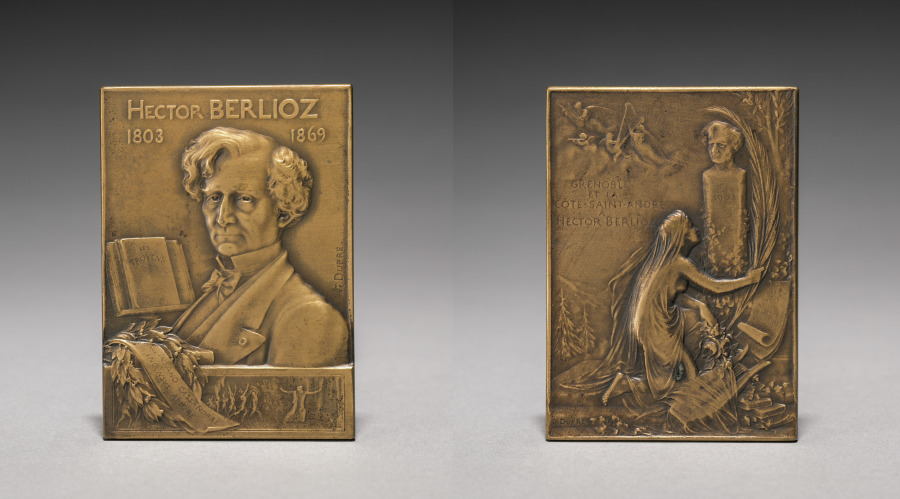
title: Medallion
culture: France, early 20th century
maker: Georges Dupré (French, 1869-1909)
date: 1903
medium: bronze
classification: Metalwork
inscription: "Grenoble et la côte-saint-andré à Hector Berlioz"; signed: "G. Dupré."